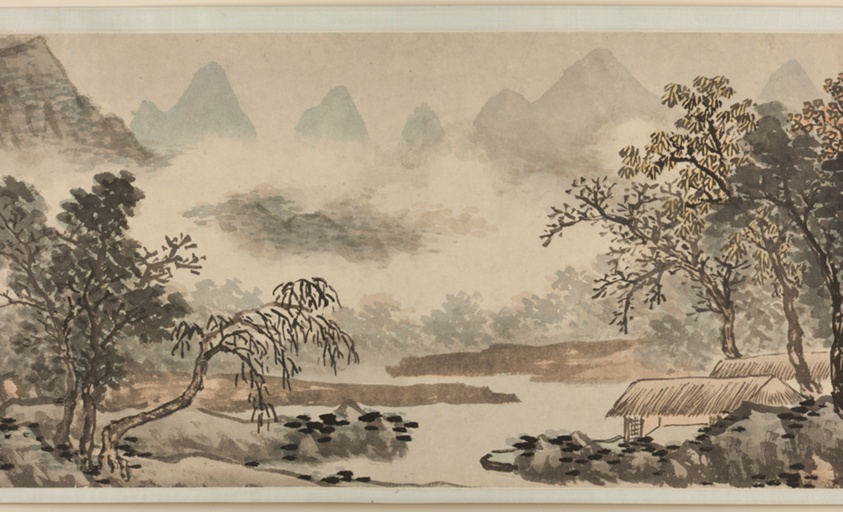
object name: Painting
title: Clouds over the River before Rain 溪雲欲雨圖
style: Chinese (culture or style)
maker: Shen Zhou 沈周 (Chinese, 1427-1509)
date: Ming dynasty (1368–1644), dated 1504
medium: Handscroll; ink and color on paper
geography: China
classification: handscroll; painting; asian art